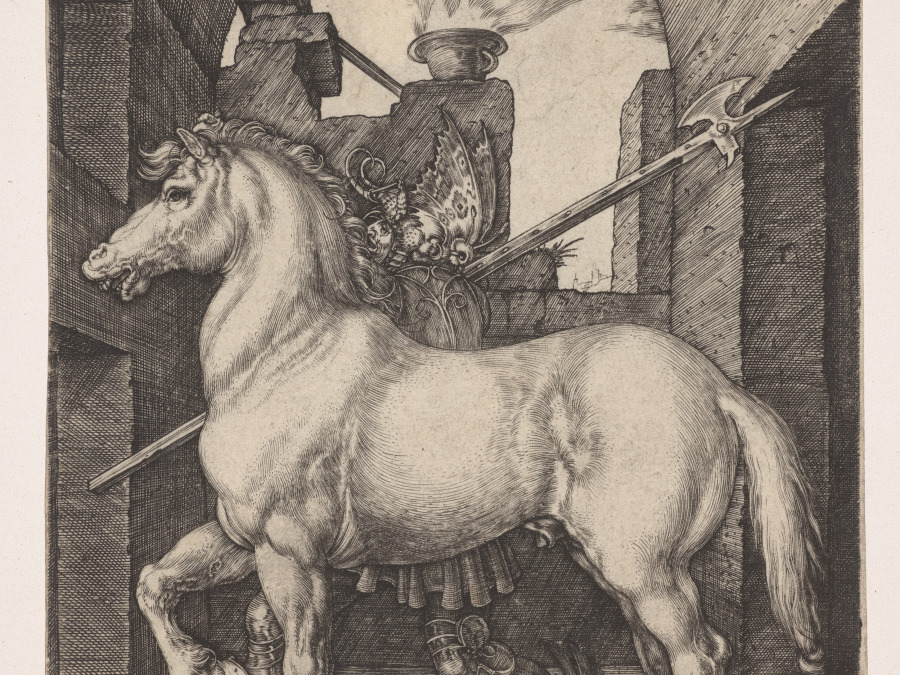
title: The Small Horse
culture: Germany, early 16th Century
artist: Albrecht Dürer (German, 1471–1528)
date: 1505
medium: engraving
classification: Print